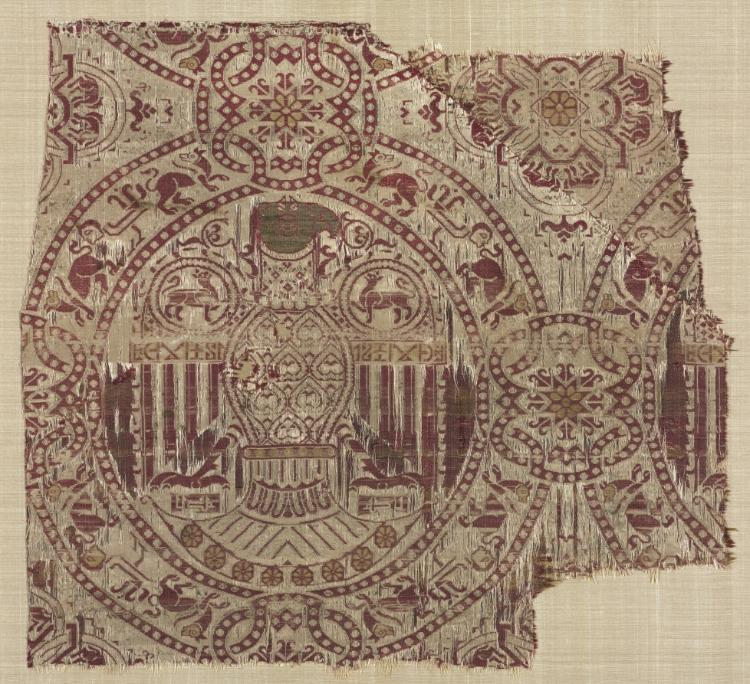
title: Fragment with eagles in roundels from the Reliquary of Saint Librada in Siguenza Cathedral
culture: Spain, Almeria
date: 1100–50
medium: Silk and gold thread: lampas weave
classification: Textile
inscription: inscription beneath claws of the large heraldic eagle: "baraka" (Blessing); another inscription on the wings seems to be of pseudo-Gothic letters.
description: This fragment belongs to a group of Spanish silks characterized by their design of aligned, slightly oval roundels that frame animals or birds. A single heraldic eagle fills the center of the roundel, and under his talons are Arabic inscriptions that read Blessing. The beaded border is animated with composite beasts and harpies. It was made during a period when the Islamic cities of Spain were the leading producers of luxury silks in Europe.